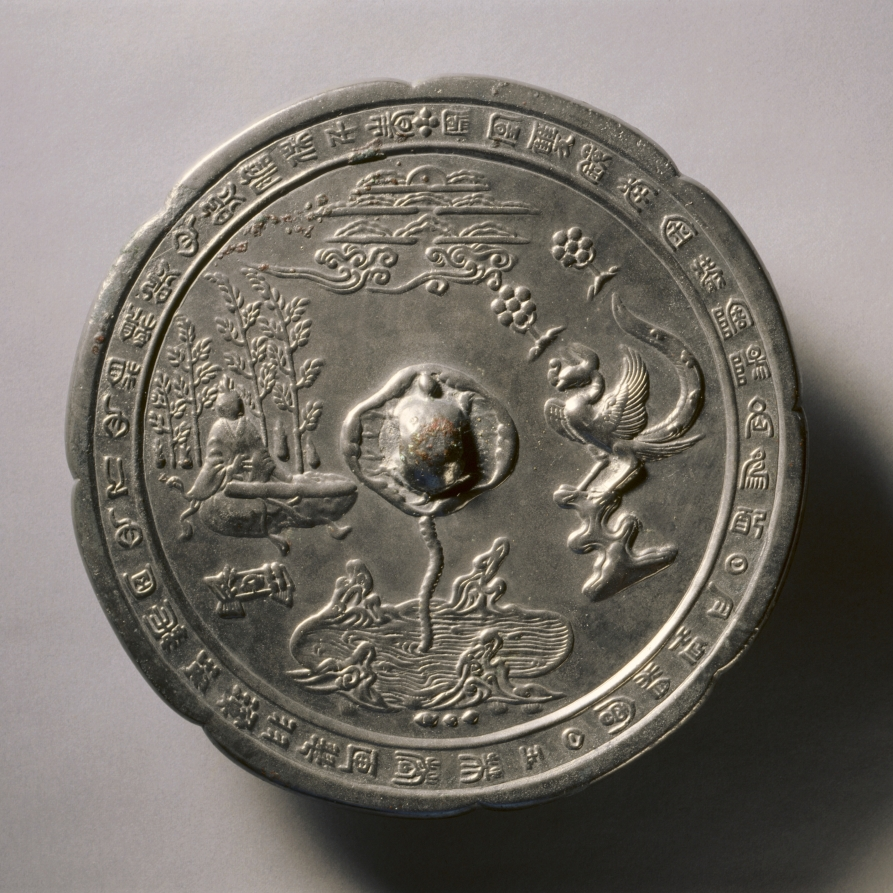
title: Lobed Mirror with a Tortoise Knob, Musician, and Phoenix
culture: China, Tang dynasty (618-907)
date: late 700s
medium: bronze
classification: Metalwork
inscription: 鳳凰雙鏡南金裝。陰陽各為配，日月恒相會。白玉芙蓉匣，翠羽瓊瑤帶。同心人，心相親，照心照膽保千春。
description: The inscription on this mirror states it was one of a pair made of metals from the south, and placed in a jade box, perhaps alluding to a wedding gift. The meaning of its design is not entirely known, but may refer to the Daoist immortal Hou Jin, who played the qin (stringed instrument), understood the language of birds, and could make predictions based on the reflections on water. The motifs of the phoenix, the pond, and the qin may all refer to the quest for immortality.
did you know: The imagery of this mirror includes a tiny turtle knob accompanied by a musician and phoenix.